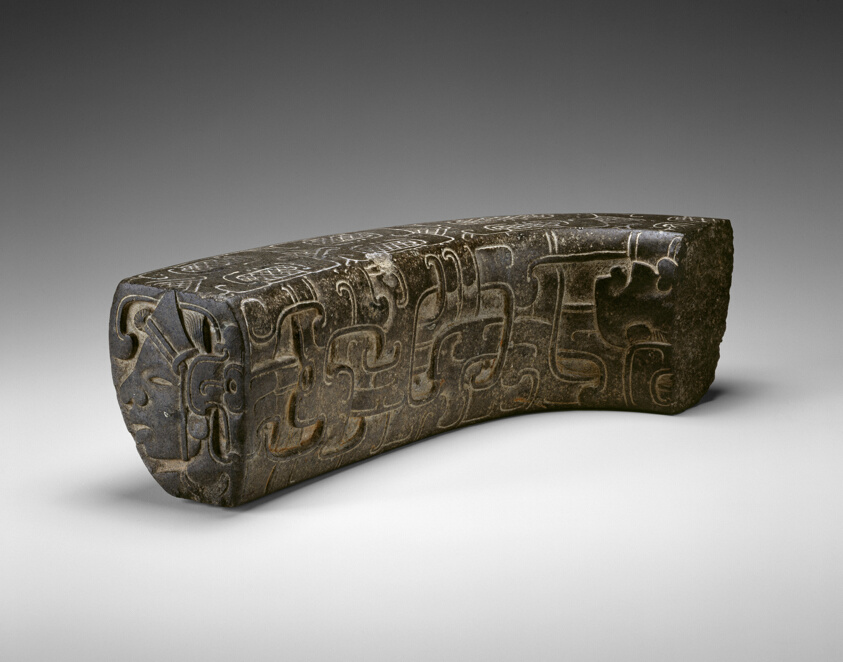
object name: Sculpture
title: Fragment of a Ceremonial Ballgame Yoke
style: totonac, tajin, classic veracruz, mesoamerican, Pre-Columbian, americas, Arts of the Americas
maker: Totonac; El Tajín and vicinity, northern Veracruz, Mexico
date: 700–800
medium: Stone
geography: El Tajín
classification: ceremonial object; stone; sculpture; art of the americas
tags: sports, scrolls (motifs), ceremony, ritual, games, abstract figures, faces, supernatural